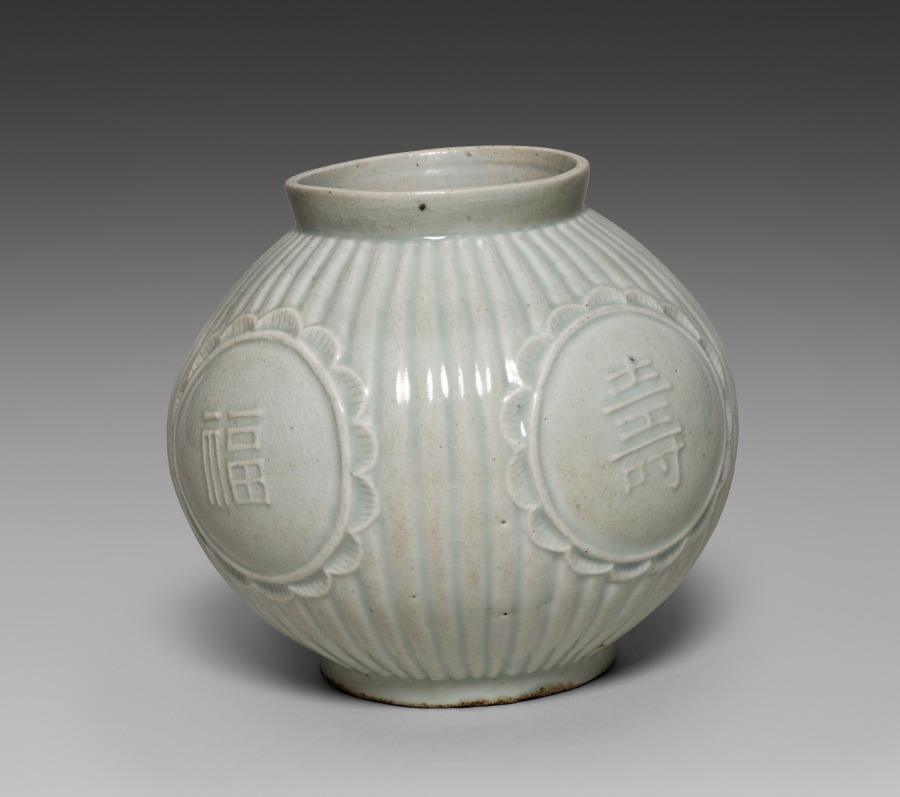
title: Jar with Four Auspicious Characters in Relief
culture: Korea, Joseon dynasty (1392–1910)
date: 1800s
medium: glazed porcelain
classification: Ceramic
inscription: longevity 壽, happiness 福, health 康, and peace 寧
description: This white porcelain vase is decorated with four Chinese characters symbolizing auspicious (hopeful) wishes—longevity, good fortune, health, and peace—each within a floral medallion. Such jars were often presented as birthday or wedding gifts, conveying the giver’s blessings for a long and harmonious life. This object was purchased in 1981 from Kochukyo (壺中居), an antique gallery founded in 1924 in Tokyo, Japan. Many important Korean works remain in Japanese private collections, after being taken there during the Japanese colonial period (1910–45). Consequently, Japanese antique galleries continue to handle Korean antiquities, serving as significant channels for their circulation today.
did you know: This type of jar with auspicious characters was often used as a birthday or wedding gift.